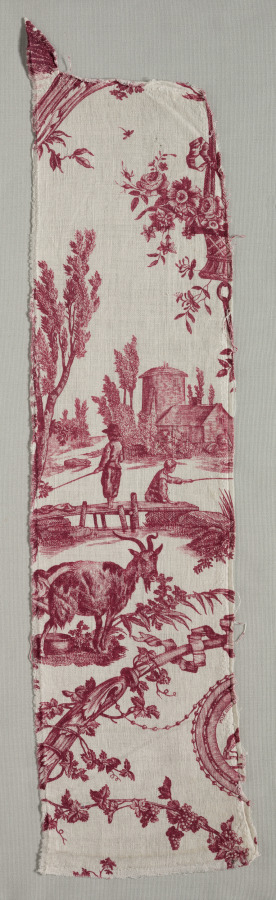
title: Fragments of Copperplate Printed Cotton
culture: France, 18th century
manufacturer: firm of Christophe Philippe Oberkampf (French, 1738–1815)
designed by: Jean-Baptiste Marie Hüet (French, 1745–1811)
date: c. 1789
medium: copperplate printed linen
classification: Textile